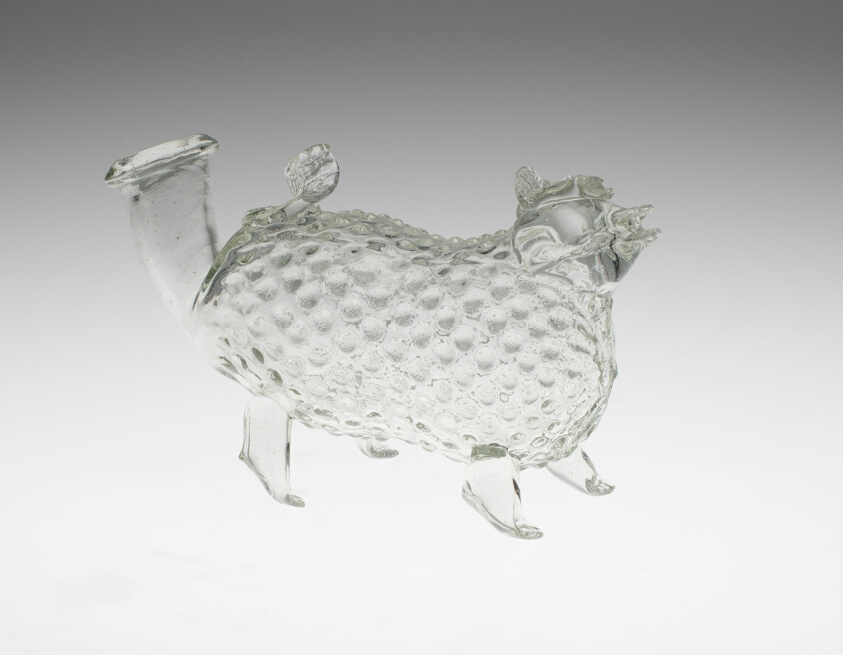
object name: Glass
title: Bottle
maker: Austria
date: 19th century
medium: Glass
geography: Austria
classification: glass; european decorative arts